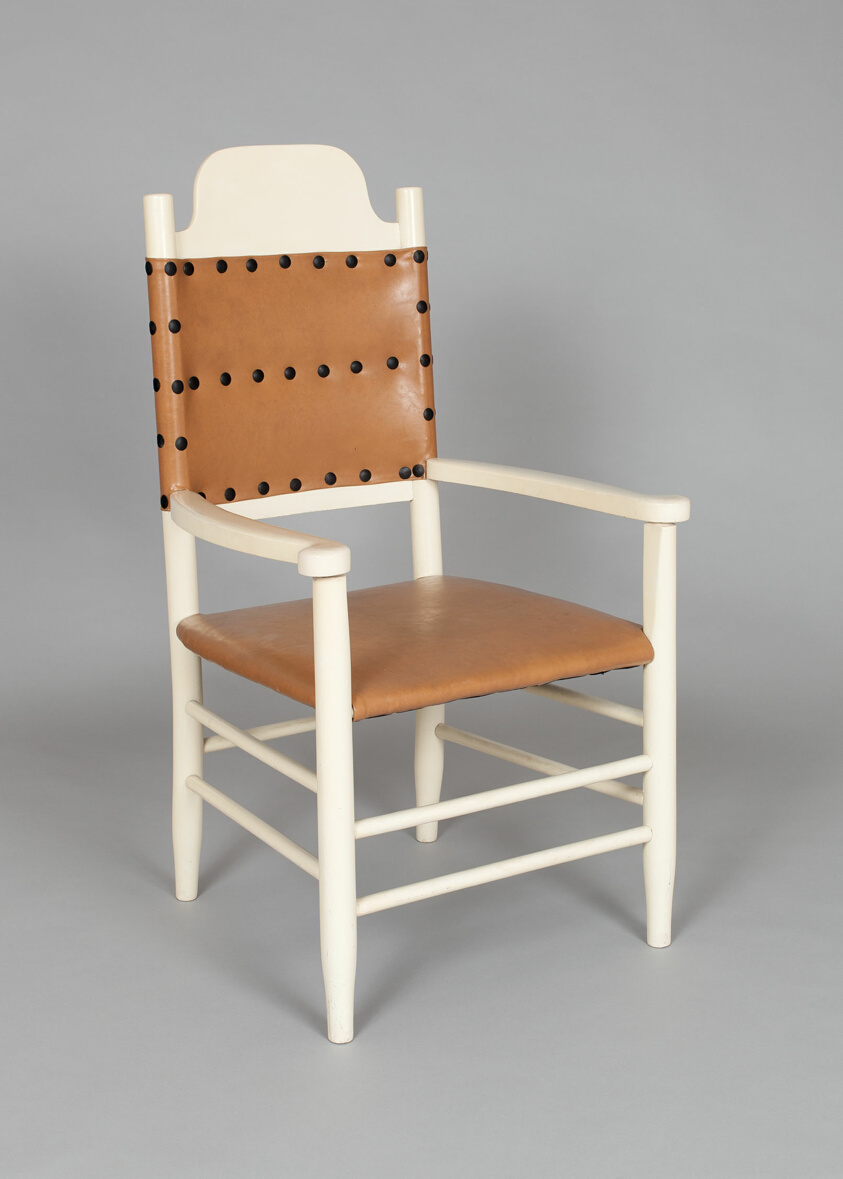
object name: Furniture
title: Armchair (part of a set)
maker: Designed by Louis Comfort Tiffany (American, 1848–1933); Made by J. Matthew Meier (American, 1830–1913) and Ernest Hagen (American, 1822–1889); New York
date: c. 1885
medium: Painted maple, with vinyl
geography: New York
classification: seating; furniture; american decorative arts; american arts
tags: furniture